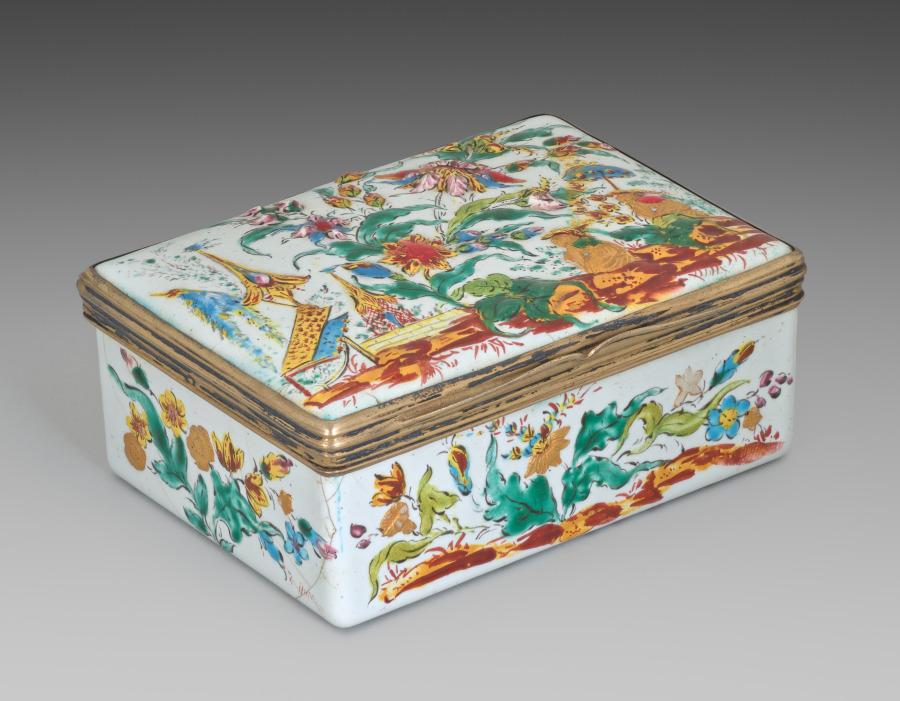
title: Box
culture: France, 18th century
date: 1749–50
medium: silver gilt and enamel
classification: Enamel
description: Chinoiserie in 18th-century France incorporated imitations of East Asian motifs, designs, and ornaments into European art. These imitations were often distorted by the European imagination and were not accurate representations of the cultures from which they drew inspiration. Elements of chinoiserie in this box can be seen primarily on the lid where enormous, vibrantly colored flowers tower over two crouching figures and a grouping of buildings.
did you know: The flower petals on the box lid are raised, an effect produced by drops of transparent enamel placed on the box’s surface that imitates polished gemstones or pearls.